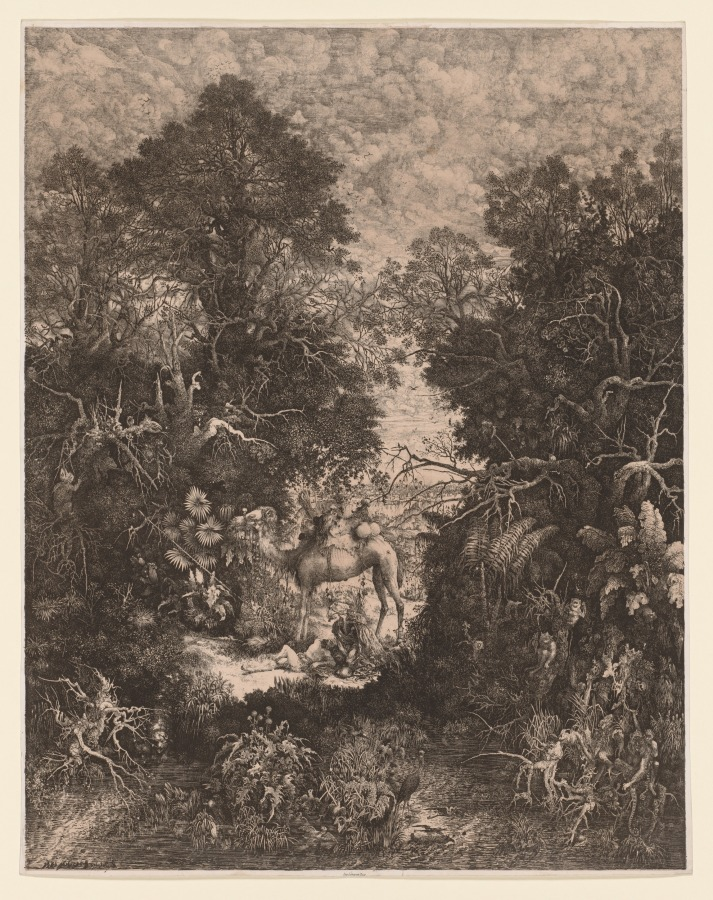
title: The Good Samaritan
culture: France, Paris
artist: Rodolphe Bresdin (French, 1822–1885)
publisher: Lemercier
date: 1861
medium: lithograph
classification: Print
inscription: lower left, in stone: Rodolphe Bresdin 1861 (in reverse); lower center, printed: Imp. Lemercier, Paris; center, in plate: RB (within image)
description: This is a highly original treatment of the biblical story of a Jewish man who had been beaten, stripped, robbed, and left for dead, and the Samaritan who helped him. This kind act is all the more heroic considering the great hatred between the Samaritans and Jews (each claimed to be the exclusive descendants of Abraham and Moses). The small scene in the center of the large sheet is surrounded by an exuberant landscape teeming with an unrealistic assortment of tropical and nontropical plants and a variety of peering animals. Bresdin used a pen and lithographic ink to detail the fauna and flora of his extraordinary imagination. However, these bizarre visions were appreciated during his lifetime by only a select circle primarily comprising inventive writers such as Victor Hugo (1802–1885) and Charles Baudelaire (1821–1867).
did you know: Rodolphe Bresdin was known in his time as "Chien-Caillou" after the impoverished artist who served as the protagonist in an 1845 novel with the same title.